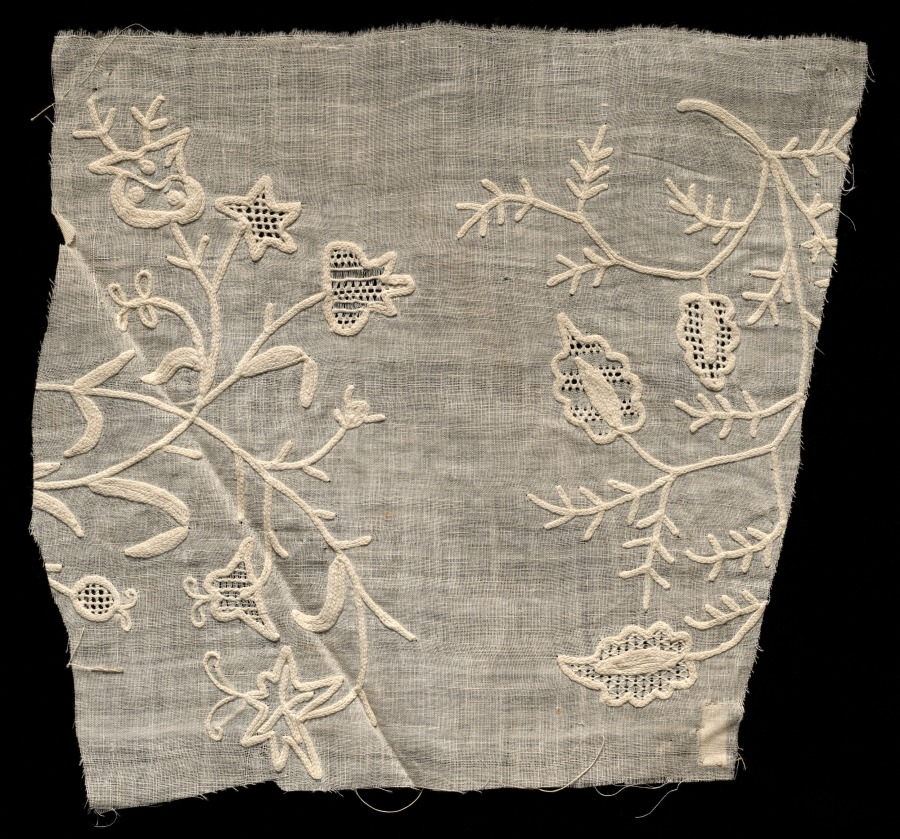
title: Lace Fragment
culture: Spain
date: 1700s–1800s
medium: Plain weave cotton: lace (drawnwork) and chain stitch (tambour work) embroidery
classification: Embroidery